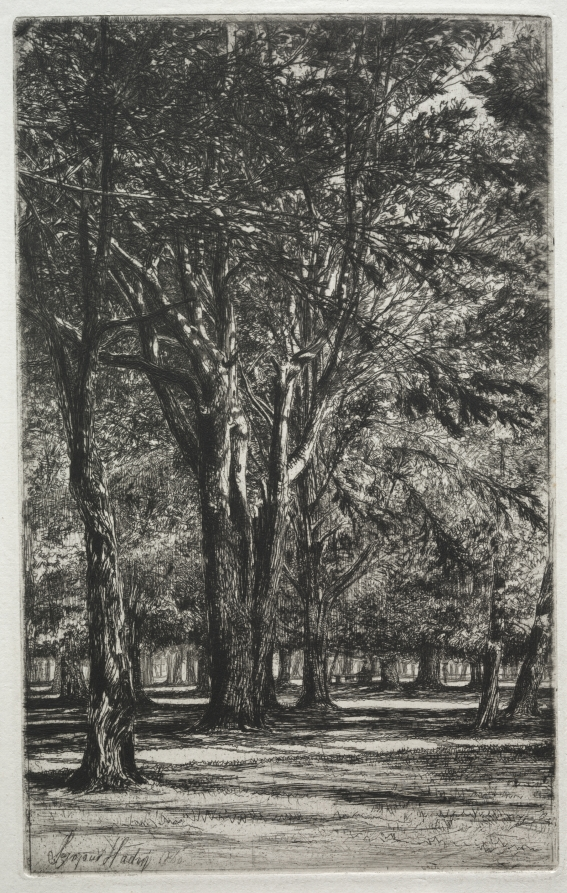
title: Kensington Gardens (The Large Plate)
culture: England, 19th century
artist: Francis Seymour Haden (British, 1818–1910)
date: 1860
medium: etching and drypoint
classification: Print